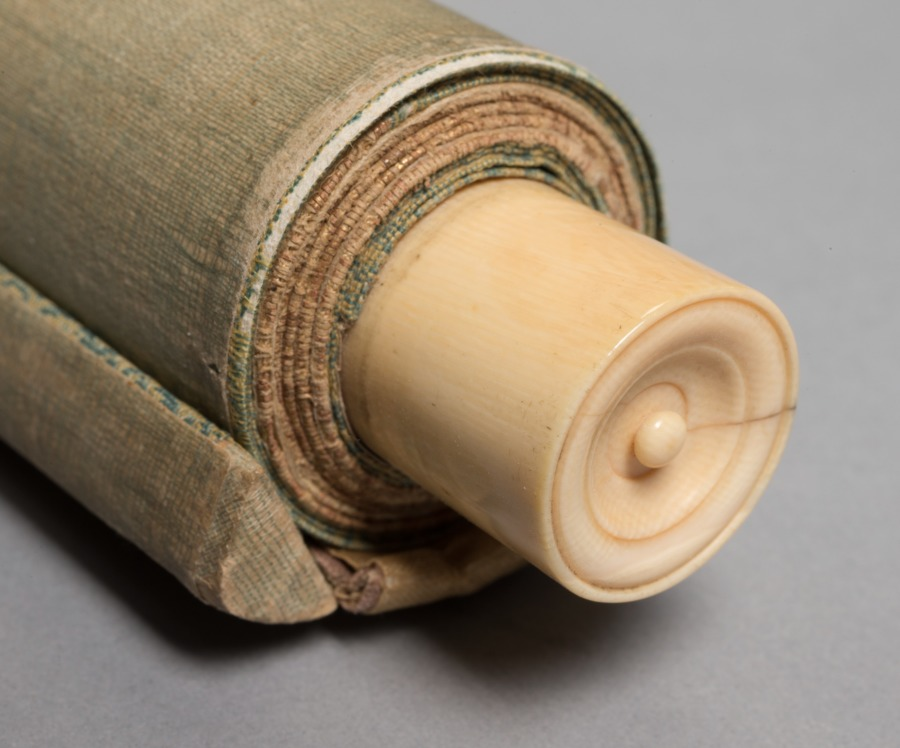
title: Crow on a Pomegranate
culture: Japan, Muromachi period (1392–1573)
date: 1500s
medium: hanging scroll; ink on paper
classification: Painting